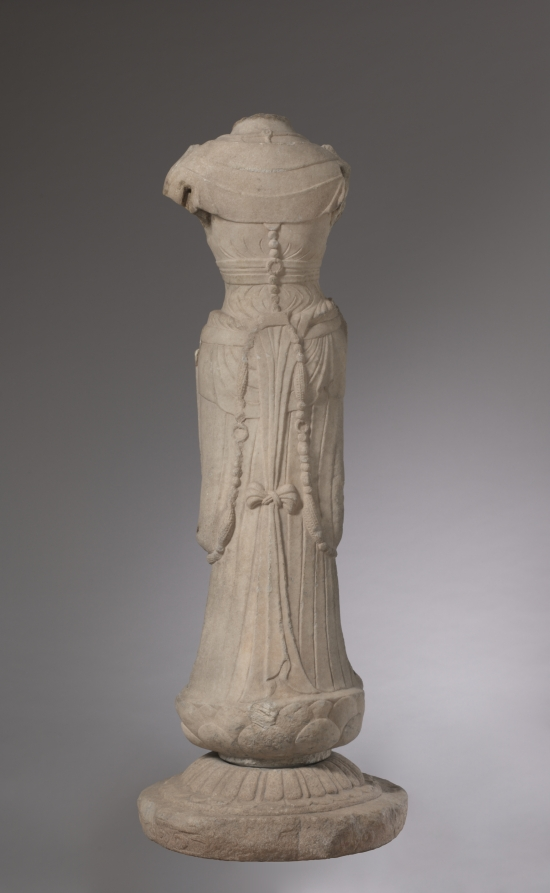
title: Bodhisattva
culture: China, Hebei province, Tang dynasty (618-907)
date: 700s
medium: white marble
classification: Sculpture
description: The bodhisattva is an enlightened being dedicated to the spiritual awakening of all beings. This white marble torso exemplifies the quest for refinement and plasticity of form that mark the golden era of Tang Chinese Buddhist sculpture. The statue was conceived with great power and grandeur. The slight sway of the hip on one side and upraised shoulder on the other result in an elegant S-curve. Emphatic lines cut into the stone create a sense of rhythm and reveal the sculptor’s skill and sureness of execution.